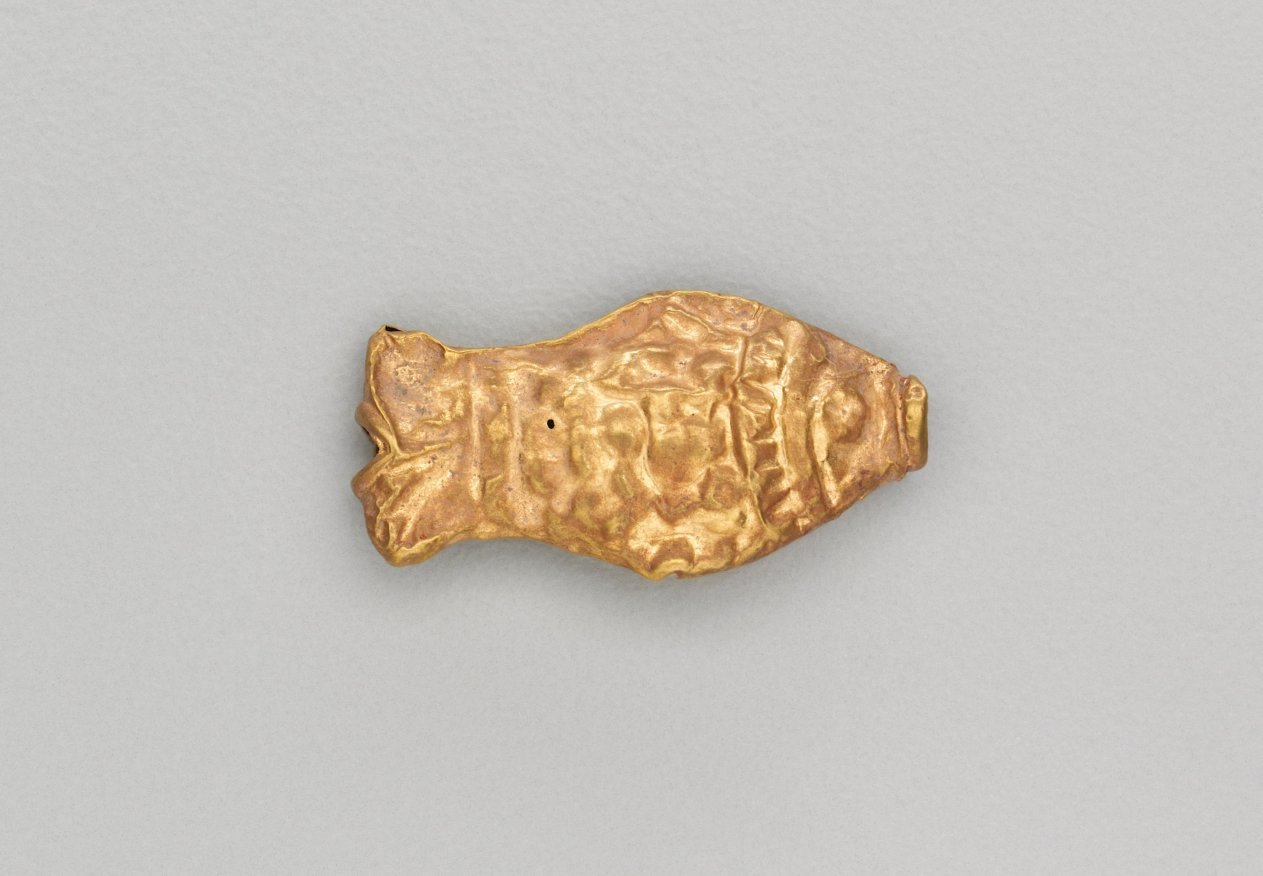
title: Necklace Bead in the Form of a Fish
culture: India, Shunga period (185–78 BCE)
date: 185–72 BCE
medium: gold repoussé with granulation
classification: Jewelry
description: Jewelry in ancient India often consisted of elements associated with water, such as fish and other aquatic plants and animals. Since water is essential for life, imagery that connotes water is life-affirming, or auspicious, and therefore appropriate adornment.